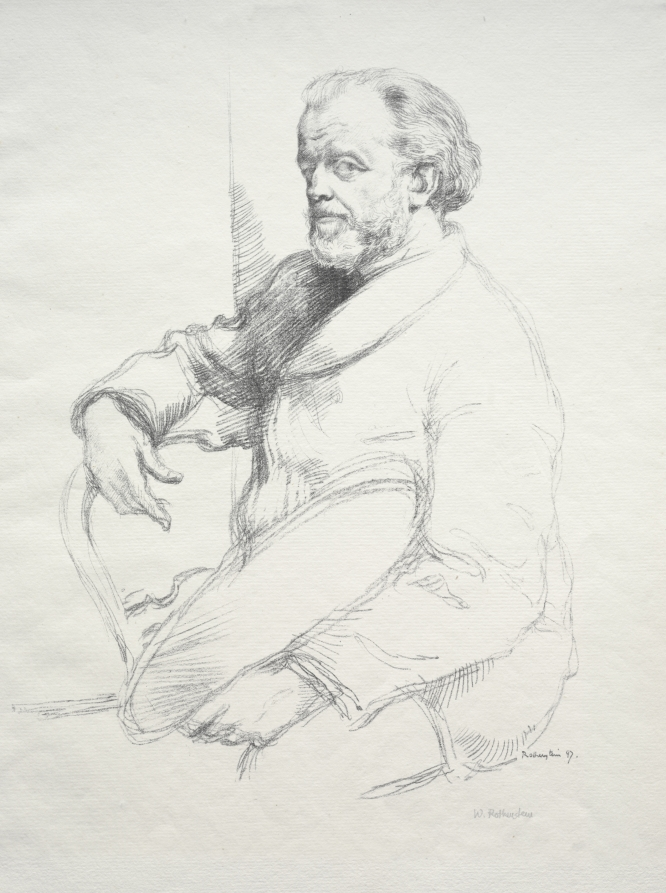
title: Henri Fantin-Latour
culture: England, late 19th Century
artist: William Rothenstein (British, 1872–1945)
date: 1897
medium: lithograph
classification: Print